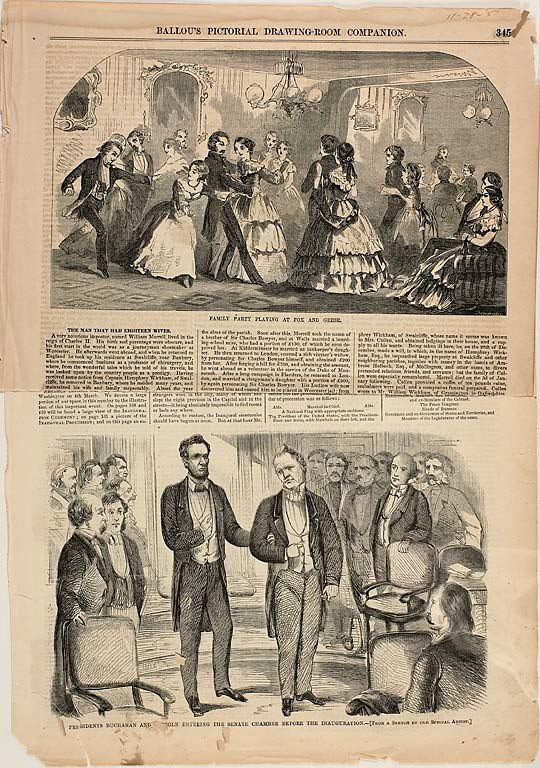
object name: Print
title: Family Party Playing at Fox and Geese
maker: Winslow Homer (American, 1836-1910); published by Ballou's Pictorial Drawing Room Companion (American, 1851-1859)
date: published November 28, 1857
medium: Wood engraving on paper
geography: United States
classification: wood engraving; print; prints and drawing